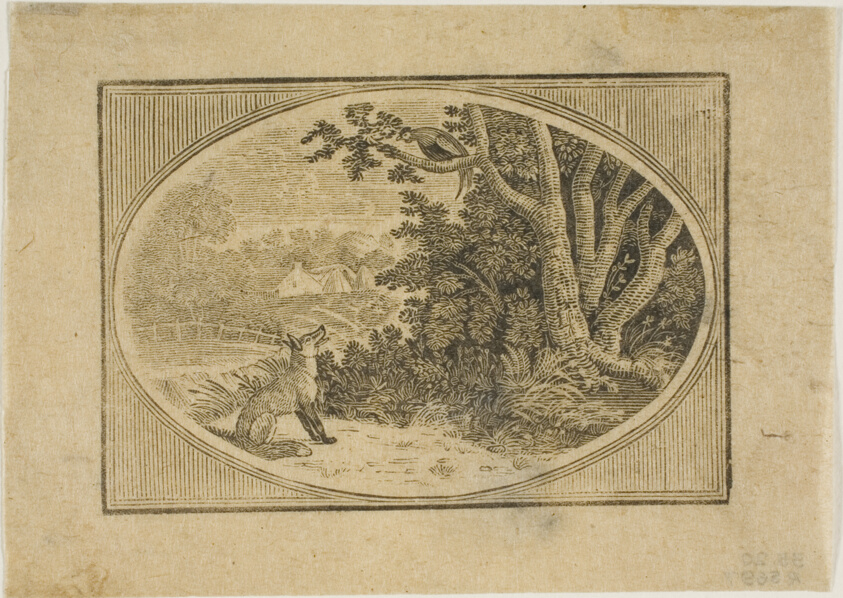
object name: Print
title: Fable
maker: Thomas Bewick (English, 1753-1828)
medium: Woodcut on paper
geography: England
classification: wood engraving; print; prints and drawing